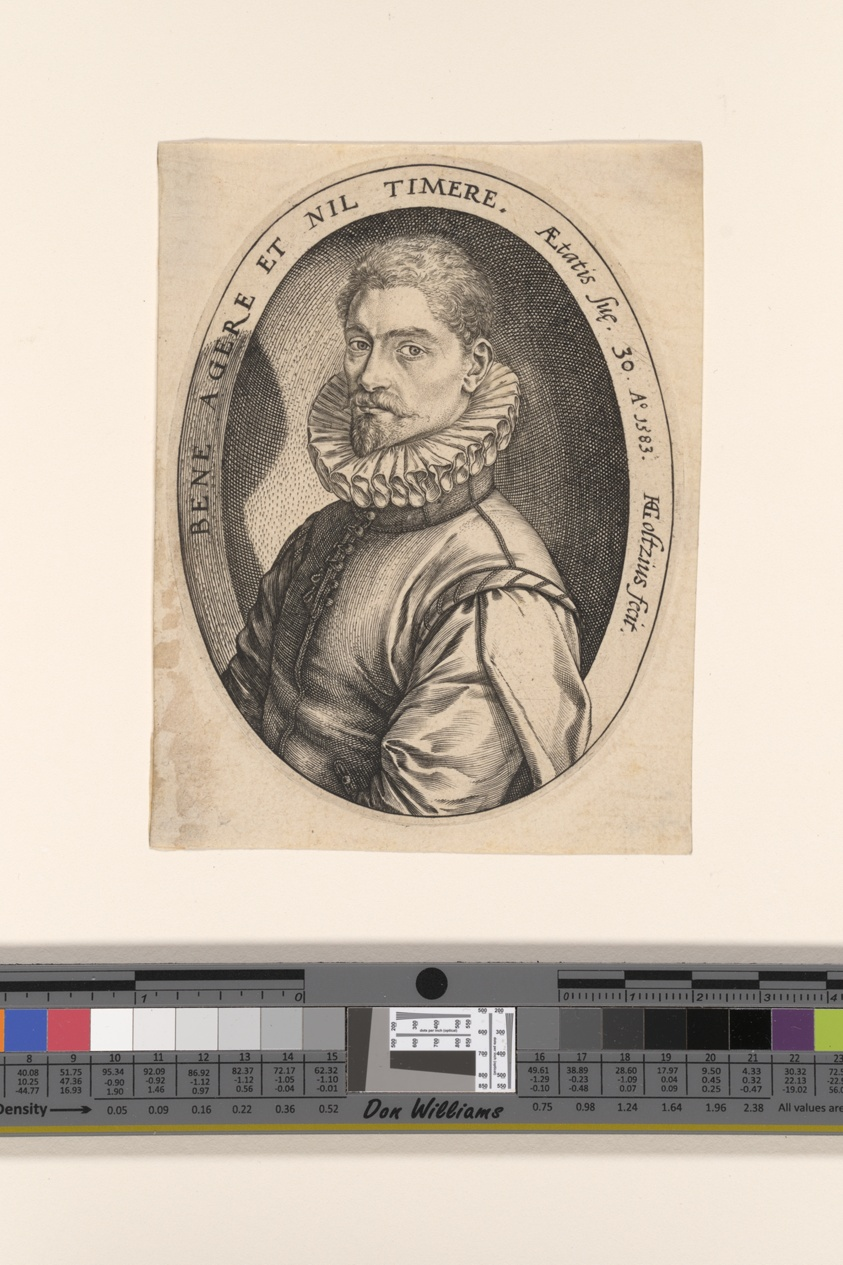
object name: Print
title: Hieronymous Scholiers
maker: Hendrick Goltzius (Dutch, 1558–1617)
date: 1583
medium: Engraving on parchment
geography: Netherlands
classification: print; engraving; prints and drawing